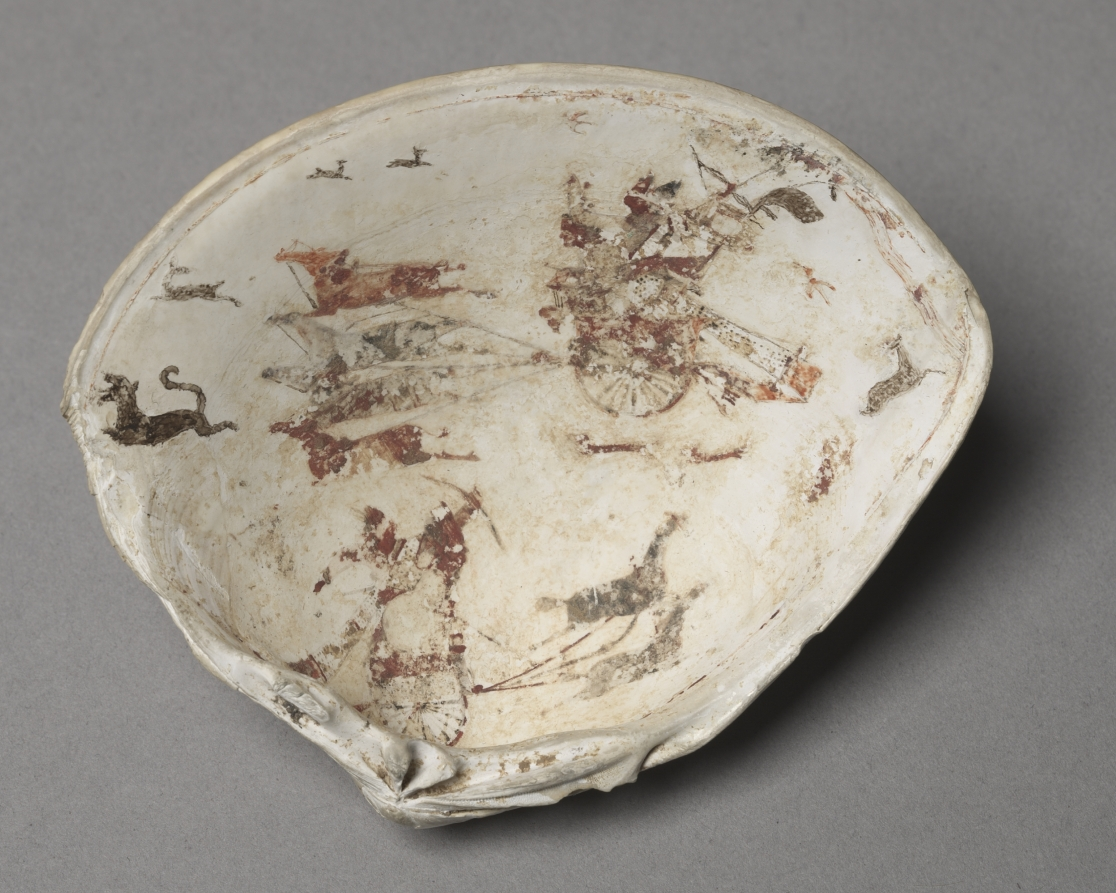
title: The Hunt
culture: China, Warring States period (475–221 BCE) to Western Han dynasty (206 BCE–8 CE)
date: 300–100 BCE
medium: Painted clamshell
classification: Painting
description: The inside of this shell preserves the earliest, extant figure paintings in Chinese history.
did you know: A four-horse chariot and a two-horse chariot are both depicted in this hunting scene.